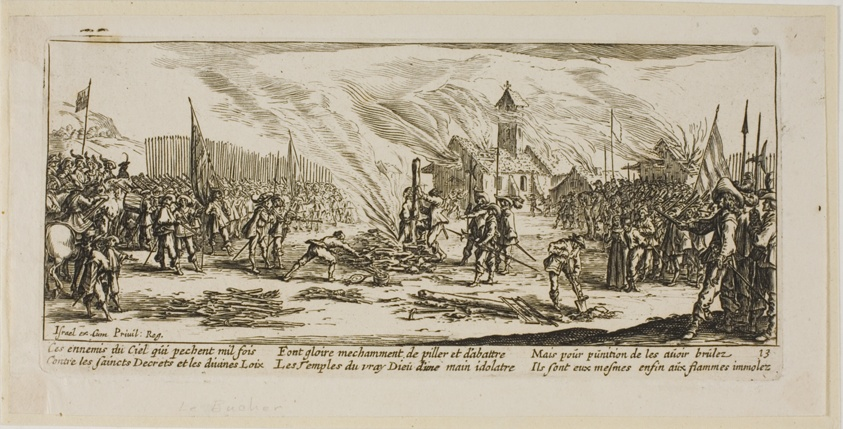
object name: Print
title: The Stake, plate thirteen from The Large Miseries of War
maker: Gerrit Lucasz van Schagen (Dutch, born 1642); after Jacques Callot (French, 1592-1635)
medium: Etching on paper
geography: Netherlands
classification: etching; print; prints and drawing